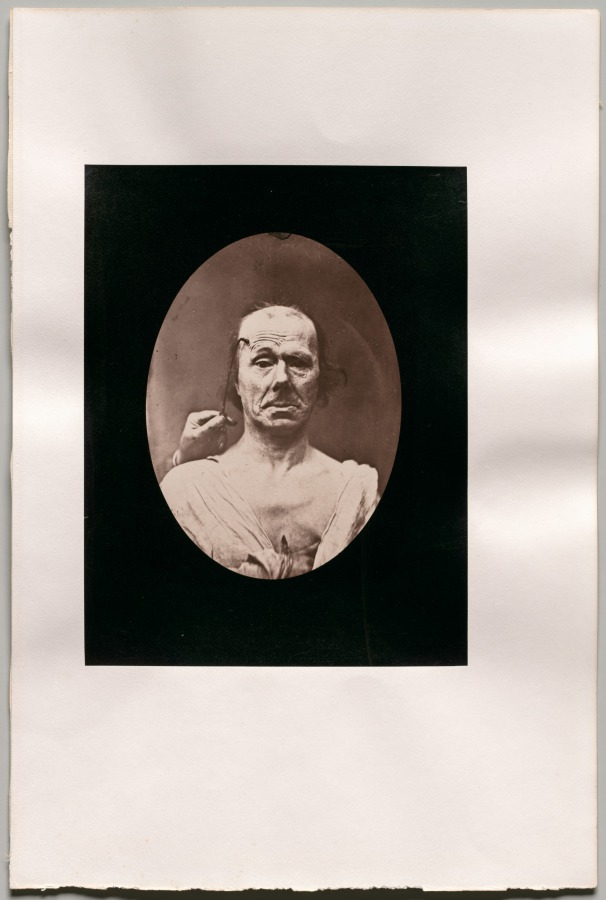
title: Figure 7: Étude du méchanisme et de l'expression du muscle frontal chez un vieillard: à droit, attention; à gauche, repos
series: Mécanisme de la physionomie humaine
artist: Guillaume-Benjamin-Amand Duchenne (de Boulogne) (French, 1806–1875)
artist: Adrien Tournachon (French, 1825–1903)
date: c. 1856, printed 1862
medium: Albumen print from glass plate negative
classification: Photograph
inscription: On the verso, lower left corner, in graphite, “fig. 7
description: Duchenne embarked on the first scientific, systematic exploration of the physiology of human facial expression and hoped, through photographs of his experiments, to teach artists how to portray those emotions. The experiments were performed by applying electrical stimulation to a single muscle on one side of the face, so that the viewer could clearly see the impact of the muscular contraction.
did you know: Duchenne, a neurologist at a hospital for the poor in Paris, turned to photography to record the grammar of human expression.